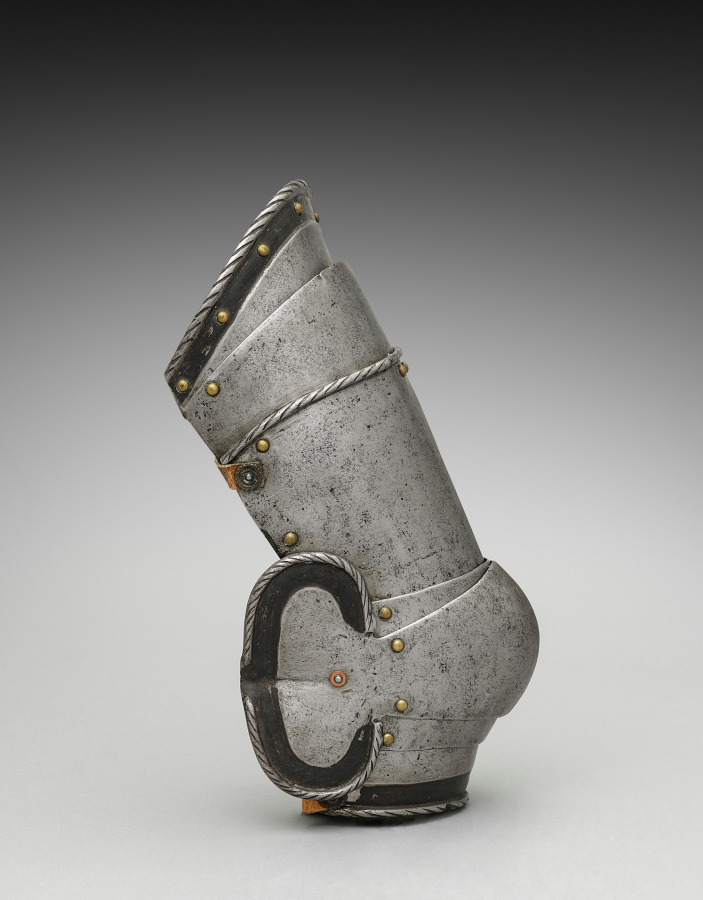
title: Right Cuisse with Poleyns (knee-cops)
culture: Germany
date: c.1550–1570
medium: iron, steel, leather and brass rivets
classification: Arms and Armor